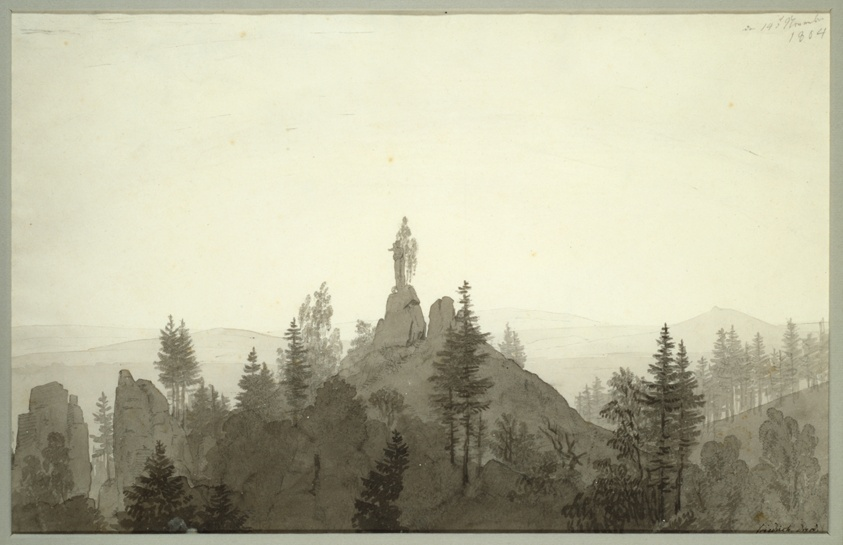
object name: Drawing and Watercolor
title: Statue of the Madonna in the Mountains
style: romantic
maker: Caspar David Friedrich (German, 1774-1840)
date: 1804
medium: Brush and black ink and gray wash, with graphite, on cream wove paper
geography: Germany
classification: ink or chalk wash; drawings (visual works); prints and drawing; paper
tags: Madonna, biblical, landscapes, trees, mountains